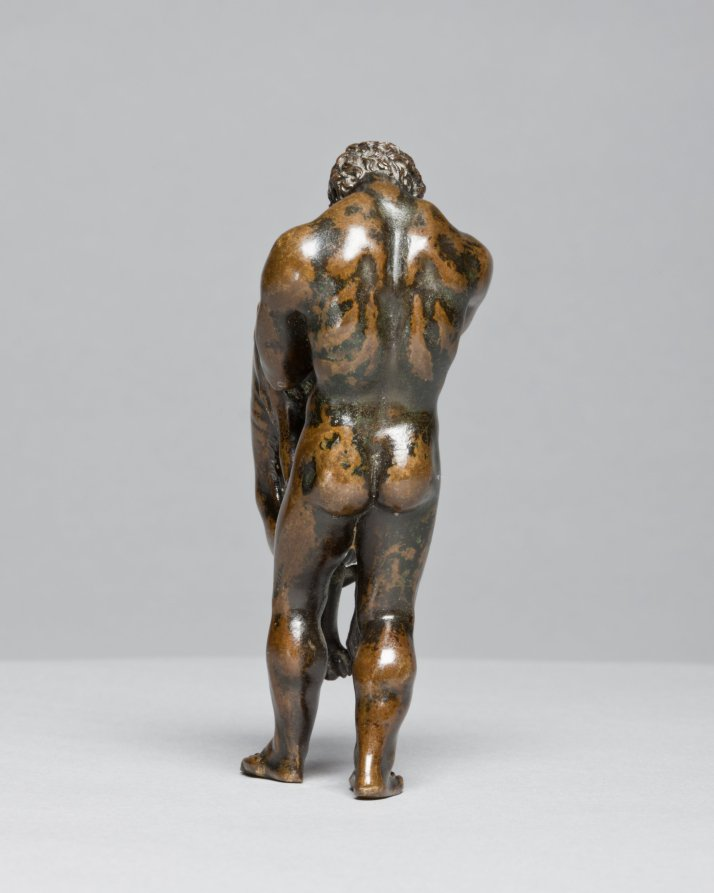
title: Hercules and the Nemean Lion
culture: Italy or France, 16th century or later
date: 1500s or later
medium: bronze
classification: Sculpture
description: The original owner of this work would have understood that this scene referred to the entire story of Hercules, the demi-god who had to accomplish twelve labors. The lion is named after the city of Nemea, near Corinth, a monstrous beast sent by the goddess Hera to wreak havoc on the area. After killing the lion, Hercules wore his pelt, commonly seen in other representations of the hero.